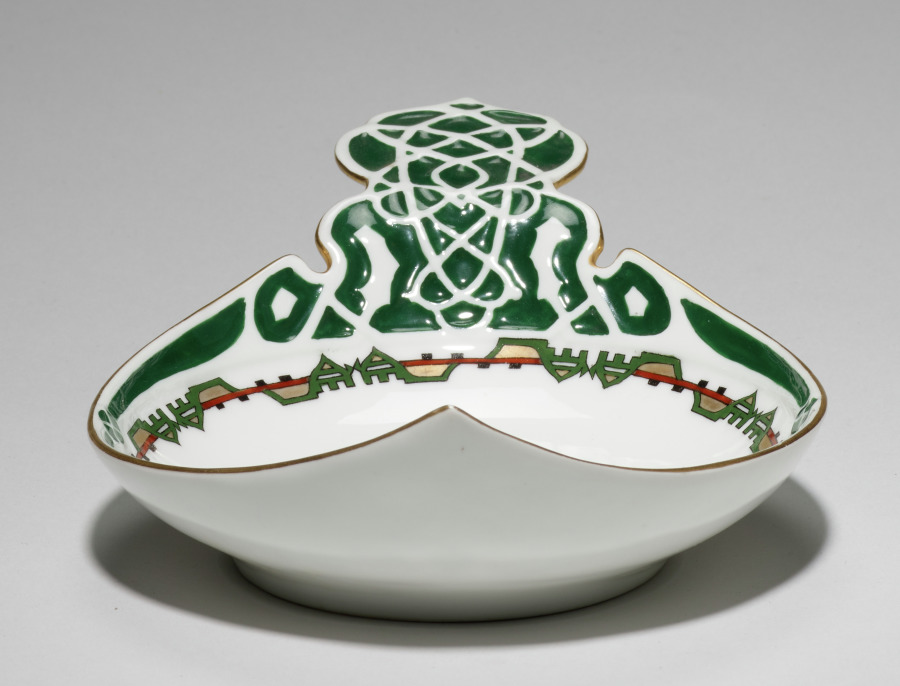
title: Porcelain "Kovsh"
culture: Russia, St. Petersburg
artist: Kornilov Brothers (Russian, established 1835)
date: 1893–1917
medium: porcelain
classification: Ceramic